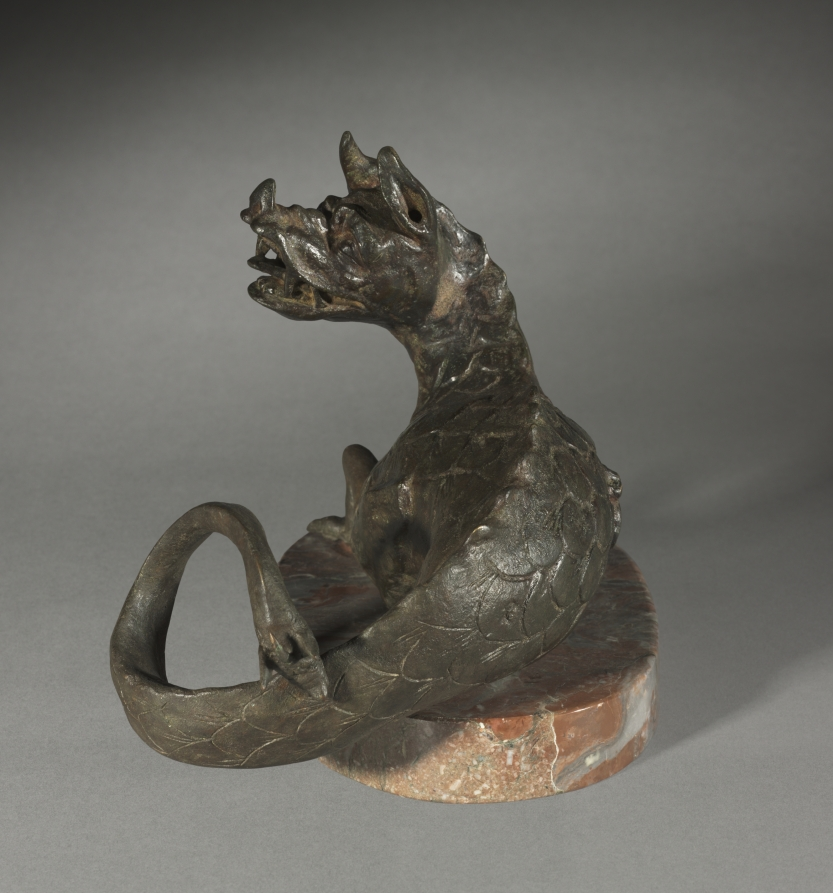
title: Dragon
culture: Italy, 18th century or later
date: 1700s or later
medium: bronze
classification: Sculpture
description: This figure was probably originally meant to serve as the decorative foundation to a larger object such as a casket or urn. In transition from decorative motif to independent work of art, the nether half may have been an addition, evidenced by the seam along its torso.